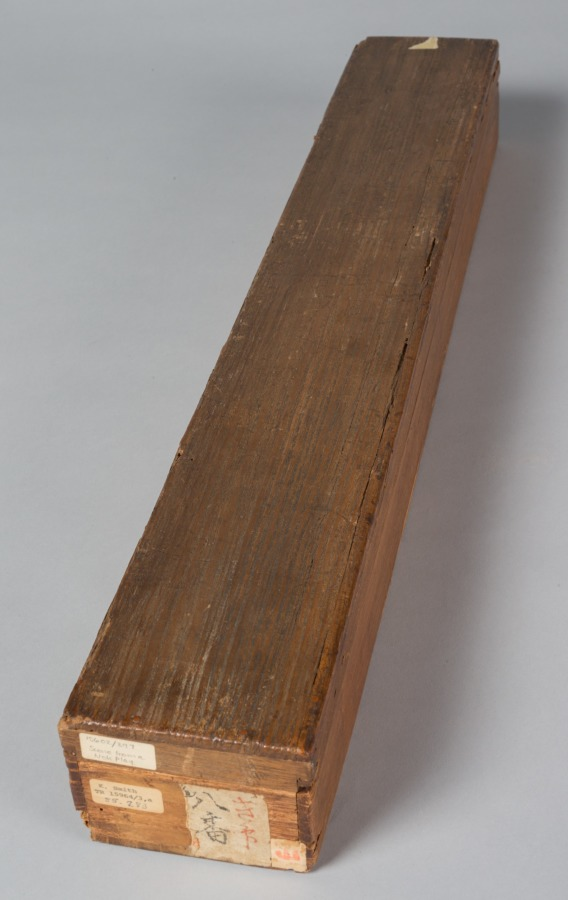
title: Scene from a Noh Play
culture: Japan, Edo period (1615–1868)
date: early 1700s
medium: hanging scroll; ink, color, and gold on paper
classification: Painting